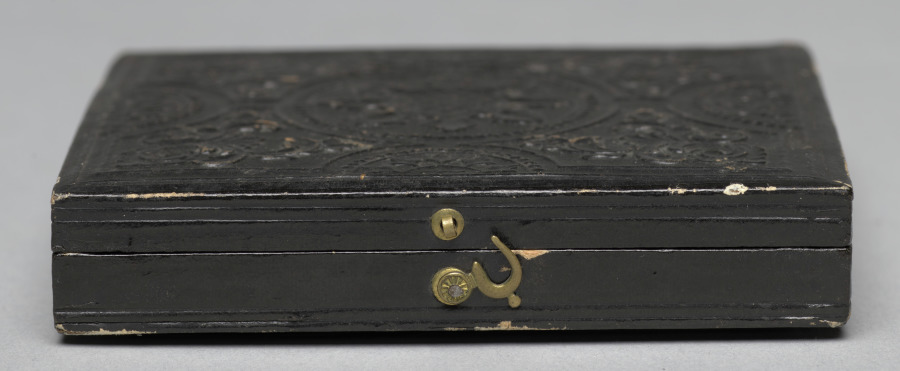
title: Shakespearean Actor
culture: America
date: c. 1858–1862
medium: ambrotype, tinted, sixth plate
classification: Photograph